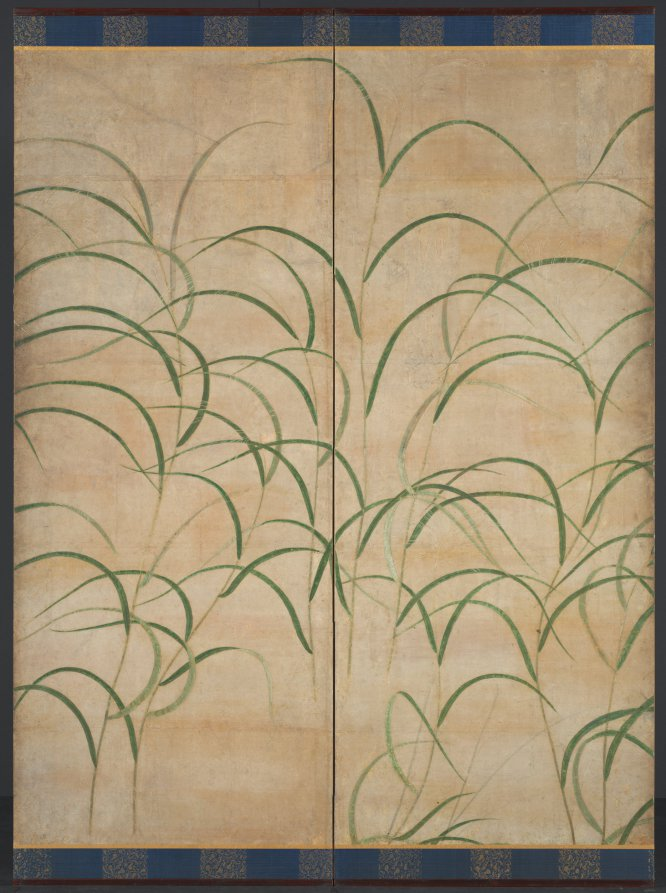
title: Susuki Grass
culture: Japan, Muromachi period (1392–1573)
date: c. 1525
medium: One of a pair of six-panel folding screens; ink, color, and gold on paper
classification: Painting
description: Susuki grass has a seasonal association with autumn in the Japanese visual and literary tradition. It is one of the “Seven Flowers of Autumn,” along with bush clover, arrowroot, pink, patrinia, mistflower, and bellflower. This composition immerses the beholder in a field of grasses and golden bands of mist. The design may have served as a backdrop for poems brushed in ink on decorated papers and attached to the surface of the screens, a practice with a long tradition in Japan.